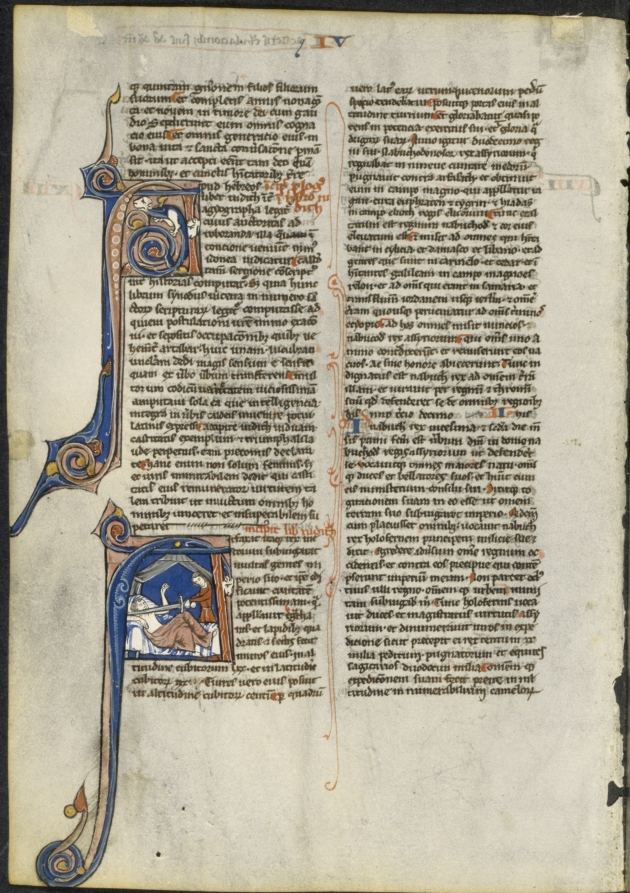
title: Leaf from a Latin Bible: Initial A and Initial A: Judith Beheading Holofernes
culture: France, Paris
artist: circle or workshop of Leber Group (French)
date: c. 1230–1240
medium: ink and tempera on vellum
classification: Manuscript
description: This pair of leaves survives with at least 13 sister leaves from the same Bible that are now in other collections. Their miniatures have been variously assigned to the Dominican Group, the Dominican Painter, and the Leber Workshop. This lack of precision suggests the difficulty often encountered in isolating individual styles in the highly formalized milieu of 13th-century Paris. The ornament, figure style, and facial details of the initials bear closest comparison with manuscripts produced in a workshop active in Paris known as the Leber Group. With its precise ornamental vocabulary, the Leber Group's style may be identified by the elaborate outgrowths extending into the margins from the initials (known as ascenders and descenders). These are characterized by cusped edges and spiraling terminals, lotus petals, and meandering hybridized animal forms, the latter often terminating in winged, dragon-like creatures. Compartmentalized initials, featuring multiple scenes, are also commonly found in manuscripts of the Leber Group.